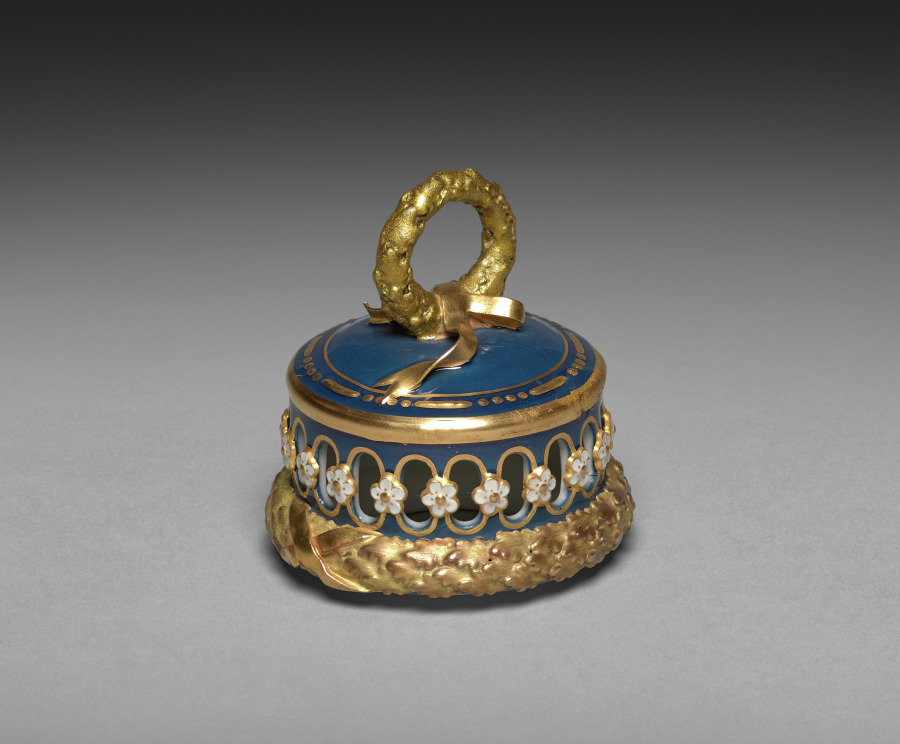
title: Cover for a Vase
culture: Germany, 19th century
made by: Meissen Porcelain Factory (German, est. c. 1710)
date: 1881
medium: porcelain with pâte-sur-pâte decoration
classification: Ceramic